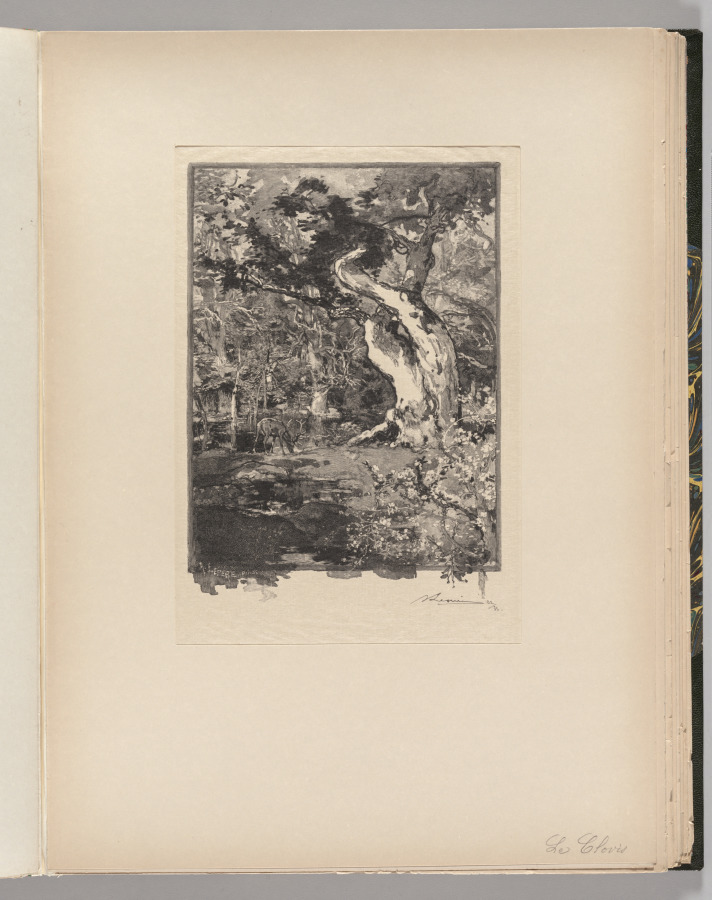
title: Fontainebleau Forest: Le Clovis, Plateau de Bellecroix (La Forêt de Fontainebleau: Plateau de Belle-Çroix, le Clovis)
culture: France, 19th century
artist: Auguste Louis Lepère (French, 1849–1918)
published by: A. Desmoulins, Published in Revue Illustrée, 1887–90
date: 1890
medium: wood engraving from bound volume of 34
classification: Bound Volume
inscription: In block, lower left: A. LEPÈRE. Del. sc; below image, lower right, in black ink: ALepère 22/35; on window mat, lower right, in graphite: Le Clovis